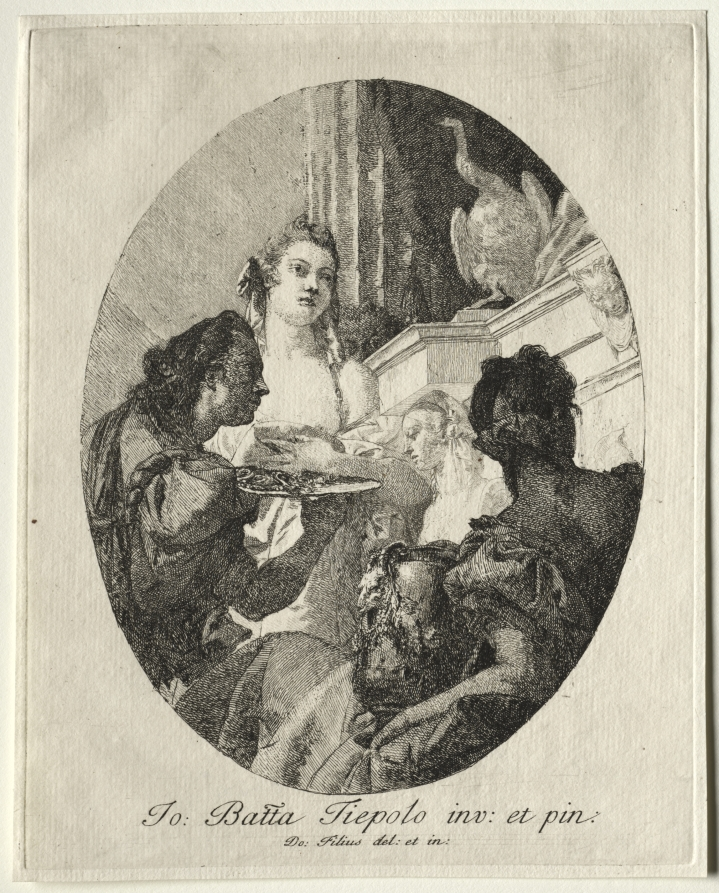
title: Three Women Presenting Gifts of Marc Anthony to Cleopatra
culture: Italy, 18th century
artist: Giovanni Domenico Tiepolo (Italian, 1727–1804)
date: c. 1750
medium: etching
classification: Print